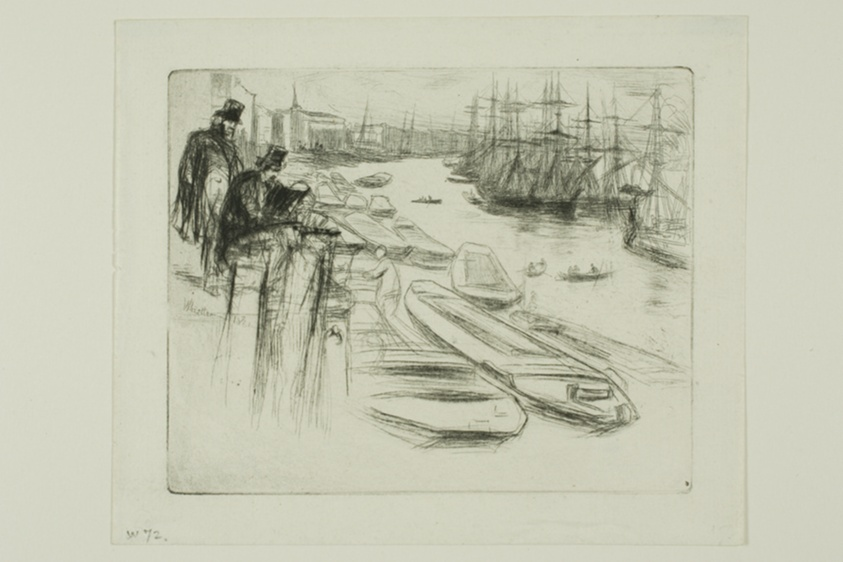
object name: Print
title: The Little Pool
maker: James McNeill Whistler (American, 1834-1903)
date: 1861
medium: Etching and drypoint with foul biting in black ink on ivory laid paper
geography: United States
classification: etching; foul biting; print; prints and drawing; drypoint; paper